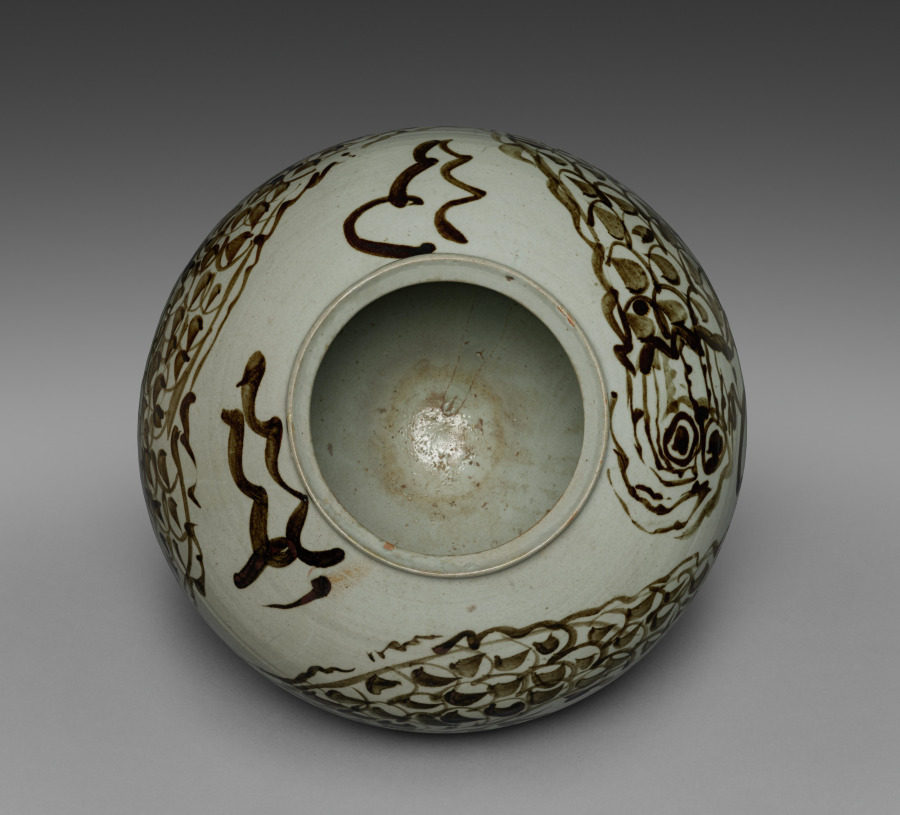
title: Jar with Dragon and Clouds Design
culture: Korea, Joseon dynasty (1392–1910)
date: late 1600s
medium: porcelain with underglaze iron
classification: Ceramic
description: In traditional Korean art, dragons were used as an emblem of royalty. Over centuries, the ways of depicting this powerful mythical creature varied in response to artistic trends and socioeconomic changes. Here, the artist imagined with free-flowing calligraphic brushstrokes a whimsical dragon with bulging eyes who wraps his scaled body around the vessel. This piece was acquired from the London Gallery in Tokyo, Japan. Its owner, Tajima Mitsuru (born about 1936) is regarded as one of the pioneering Japanese art dealers to cultivate lasting relationships directly with collectors and museums in the United States.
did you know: A mythical creature believed to have the power to make rain, the dragon is a prominent symbol of rulers in premodern East Asia; the image of dragons was used exclusively for the king's paraphernalia.